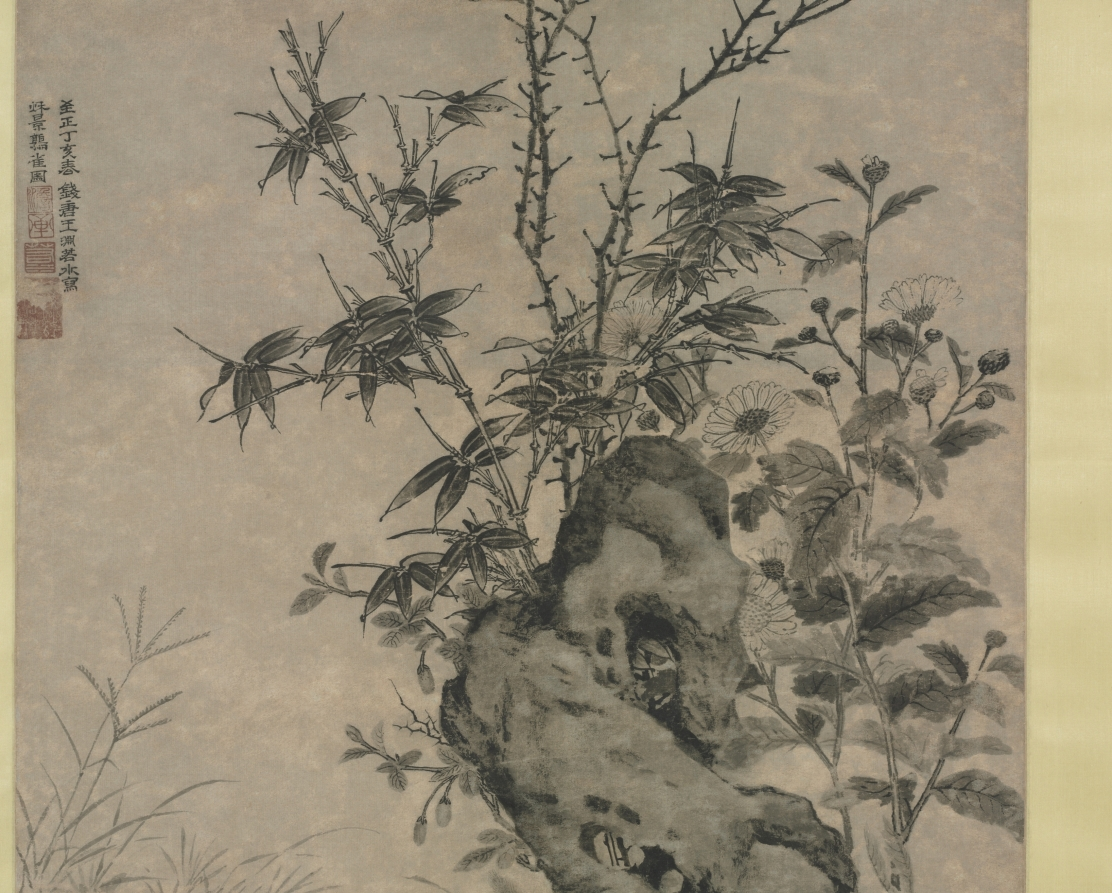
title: Quails and Sparrows in an Autumn Scene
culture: China, Yuan dynasty (1271-1368)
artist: Wang Yuan (Chinese, c. 1299-after 1366)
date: 1347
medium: hanging scroll, ink on paper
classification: Painting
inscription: 至正丁亥春 錢塘王淵若水寫秋景鶉雀圖 [印] 澹轩; [印] 若水; [印] 墨妙筆精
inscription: 翦翦輕風搖翠葆，團團清露滴金叢。 劍南畫手今何在，冷落賓榔枸杞新。 鐵篴 [印] 杨维桢印; [印] 廉夫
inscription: 1 inscription and 10 seals of the Qianlong emperor (r. 1736-95)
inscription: 4 seals of Zhang Heng 張珩 (1915-1963)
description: The flower-and-bird subjects here are depicted in a meticulous manner, echoing the academic tradition but translating the customarily colored images to plain monochrome. Fine ink lines combined with carefully graded washes define the contours and give subtle modeling to the natural forms. Wang Yuan excelled in flower-and-bird subjects as well as landscape and figure paintings. A child prodigy, he was instructed by the great Yuan master Zhao Mengfu at an early age.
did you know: Wang Yuan was from Qiantang, today’s Hangzhou in eastern China.